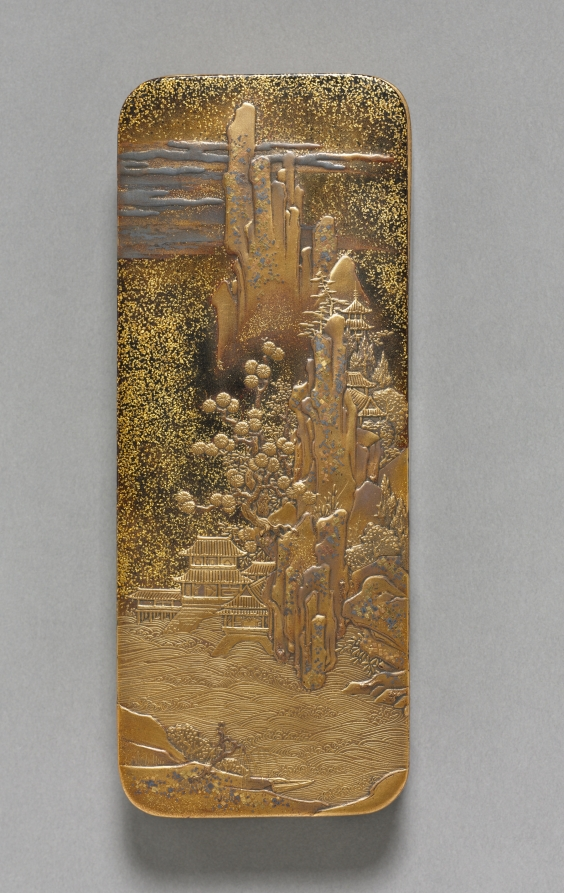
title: Box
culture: Japan, Edo period (1615–1868)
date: 1800s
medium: lacquer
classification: Lacquer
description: For the cover designs on writing boxes, Chinese motifs like Mt. Penglai (Horai-zan in Japanese), the island of immortality, remained popular. A landscape with a river, buildings, mountains, trees, and clouds decorates the top of this portable writing box while the inside is embellished with clouds, birds, water, and grasses and offers a space for a tiny ink stone.